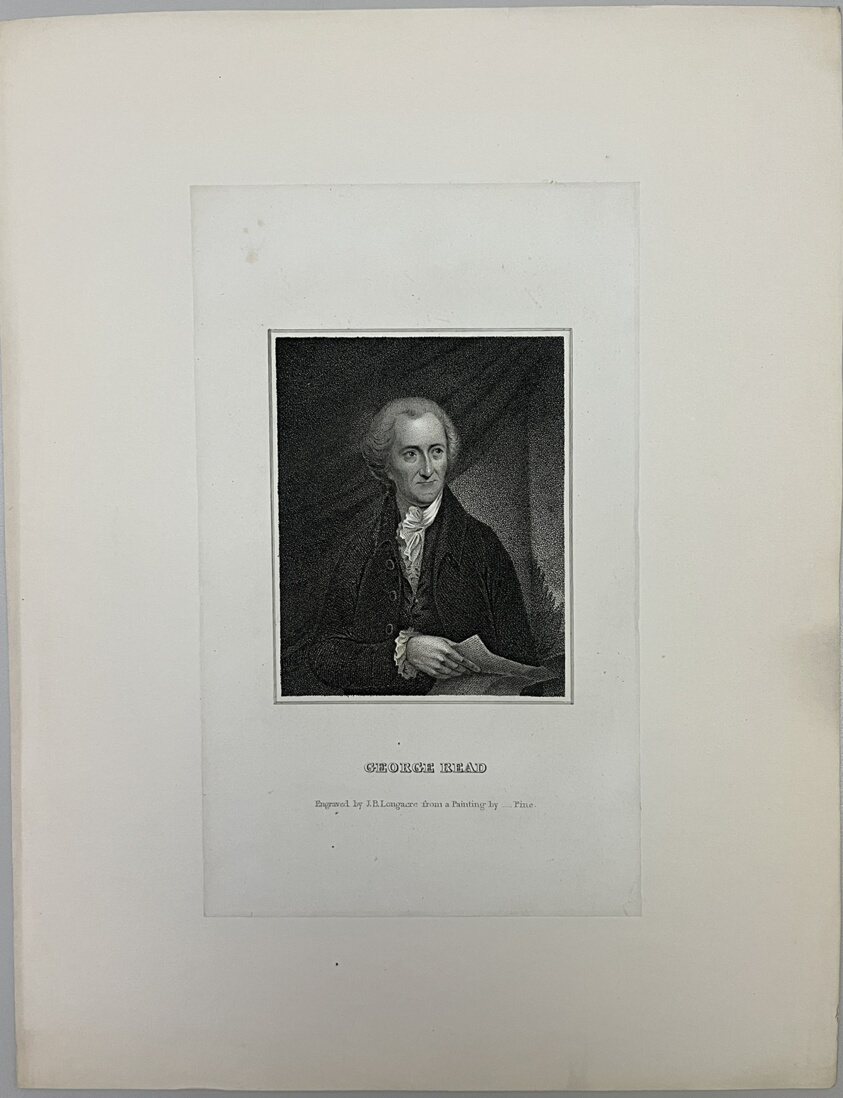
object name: Print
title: George Read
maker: James Barton Longacre (American, 1794-1869); after Robert Edge Pine (British, 1742-1788)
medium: Stipple engraving on paper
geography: United States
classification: reproduction; print; prints and drawing